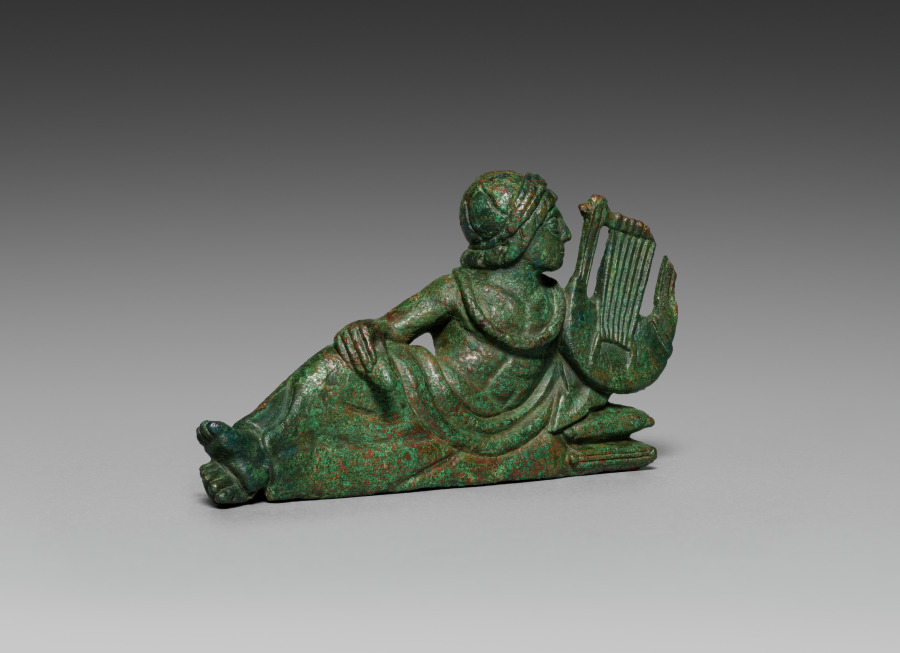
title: Vessel Ornament of Reclining Lyre-player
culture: Etruscan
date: probably 400–375 BCE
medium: bronze with gilding traces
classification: Sculpture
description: This bronze banqueter figurine was one of six once adorning the rim of a large basin, now lost. Cast in molds with individualized details, most have grooves on their underside to attach to the basin. Minute traces of gilding remain on areas of clothing and skin (mostly visible only under magnification), suggesting that they may have been completely gilded. Two handles in the form of hippocampi, horses with serpentine tails, also belonged to the basin and are now displayed at the Michael C. Carlos Museum at Emory University. The basin may have been used to hold liquid for a banquet, or was perhaps funerary. This reclining banqueter holds a lyre in his left hand and an oblong pick in his right hand. His face tilts toward the lyre and garlands hang around his head and chest. Two bare feet emerge from the bottom of the himation in a position distinct from the feet of the other figurines in this group. Some gilding remains on the top edges of the lyre and on the banqueter’s lips and drapery.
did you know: The lyre held by this banqueter bears traces of gilding.